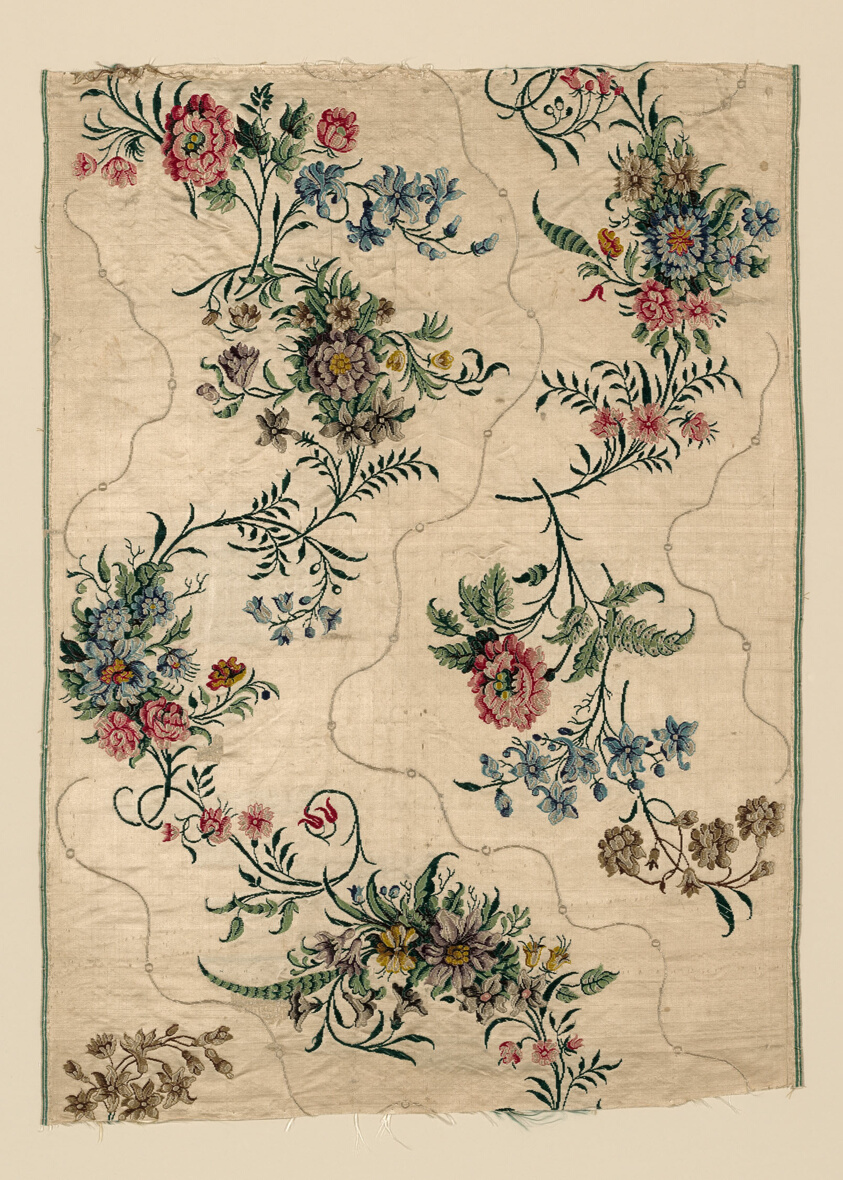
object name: Textile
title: Panel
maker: England, Spitalfields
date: 1750s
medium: Silk, warp-float faced satin weave with supplementary brocading wefts and self-patterned by areas of ground weft floats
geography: Spitalfields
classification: textile; weaving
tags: flowers, garlands